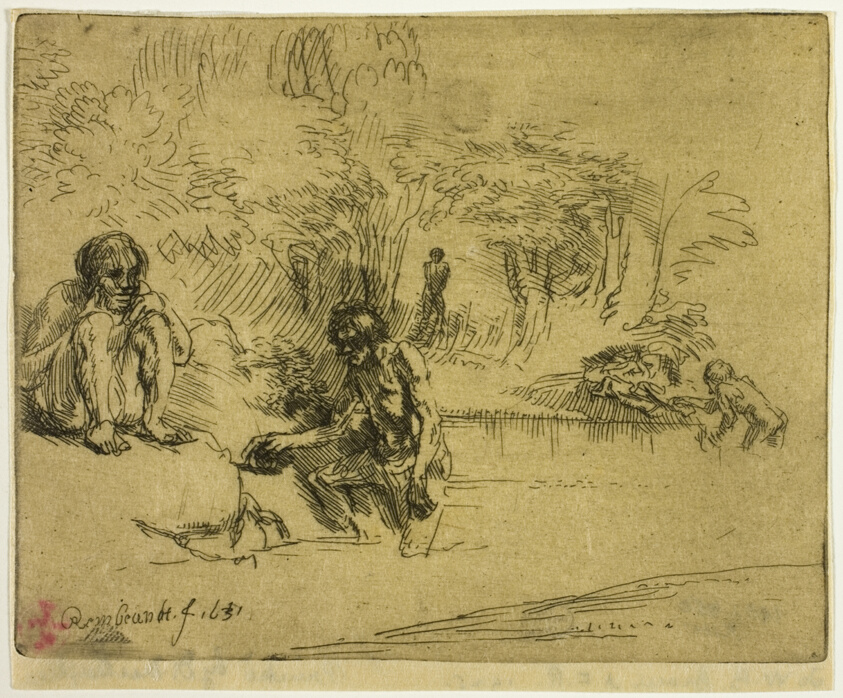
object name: Print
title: The Bathers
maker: Rembrandt van Rijn (Dutch, 1606-1669); printed by Donald Shaw MacLaughlan (American, born Canada, 1876-1938)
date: 1651, printed 1906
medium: Etching in black on cream wove paper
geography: United States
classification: etching; print; prints and drawing